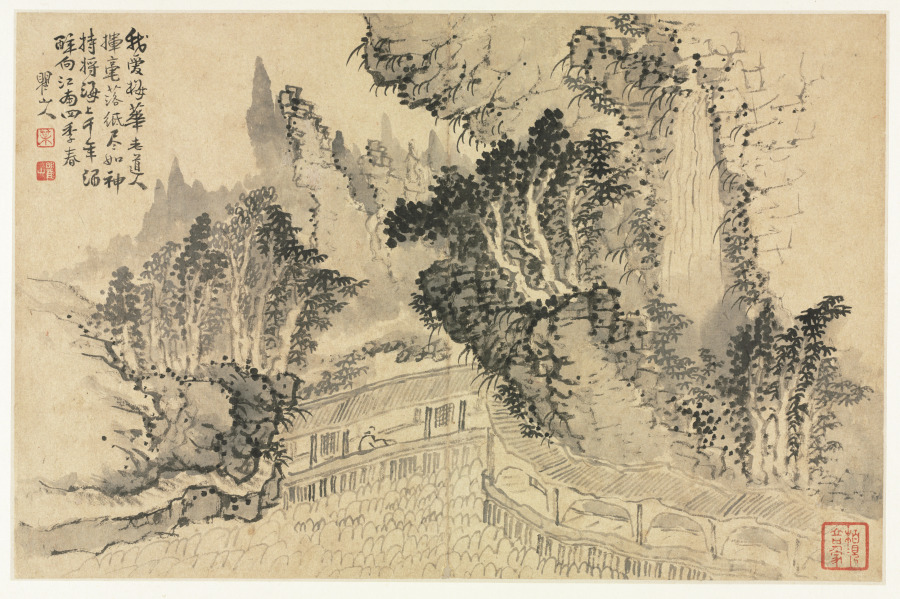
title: Landscapes in Various Styles after Old Masters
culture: China, Qing dynasty (1644-1911)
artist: Mei Qing (Chinese, 1623–1697)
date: 1690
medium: album leaf: ink and color on paper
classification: Painting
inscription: Spring Leaf II (formerly Leaf B). Artist's inscription, signature, and seals: I am fond of the old Daoist of the Plum Blossoms [Wu Zhen];/ His brush traces scattered upon the paper are all extraordinary./ He brought the nectar of the immortals from the oceans,/ To get himself drunk in the everlasting spring of Jiangnan. Qushan ren [2 seals] Mei; Qushan [seal, lower right corner] Bo jian shan kou ren jia.